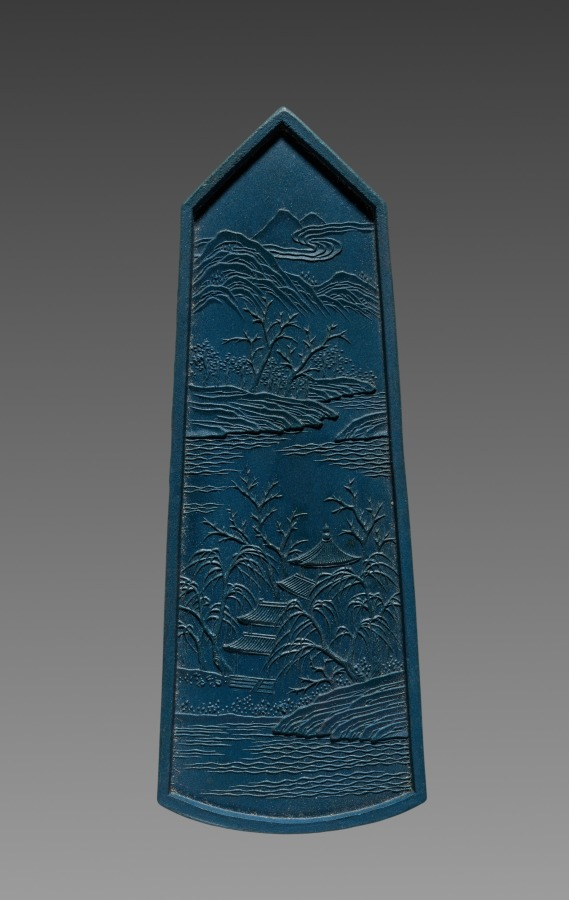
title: Ink Stick from an Imperially Commissioned Set of Ink Stick with Images and Poems of Famous West Lake Sites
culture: China, Qing dynasty (1644–1911), Qianlong reign (1736–95)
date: 1780–94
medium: Molded ink in blue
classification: Miscellaneous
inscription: 乾隆年製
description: This is one of ten ink cakes of different shapes and colors stored in an exquisite lacquer box. Each is inscribed in gold with a poem by the Qianlong emperor, praising the ten famous sights of the Westlake in Hangzhou, near Shanghai. The Westlake is famous for its natural beauty; it was a favorite imperial destination and remains a tourist attraction today. Ink cakes (also called ink sticks) are dissolved with the addition of water and ground on the surface of a flat stone into liquid ink for painting and calligraphy. The precious ink cakes here, however, have never been used.